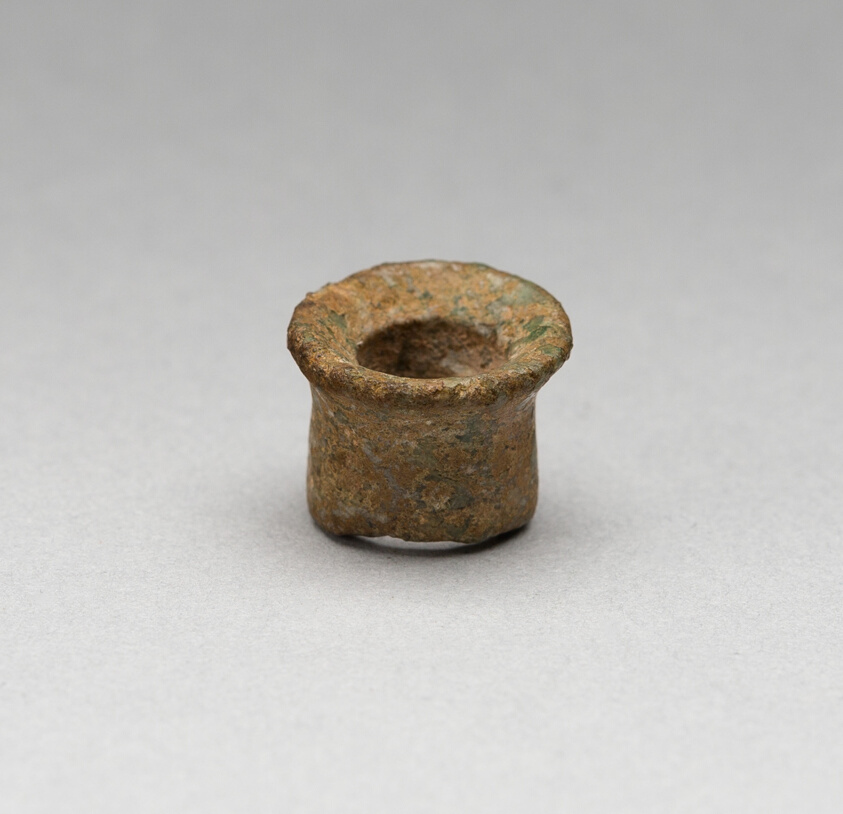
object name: Costume and Accessories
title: Earflare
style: mesoamerican, Arts of the Americas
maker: Possibly Oaxaca, Mexico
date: Possibly 500 BCE–1000 CE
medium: Jadeite or serpentine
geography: Oaxaca state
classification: ear ornament; stone; jewelry; costume; art of the americas